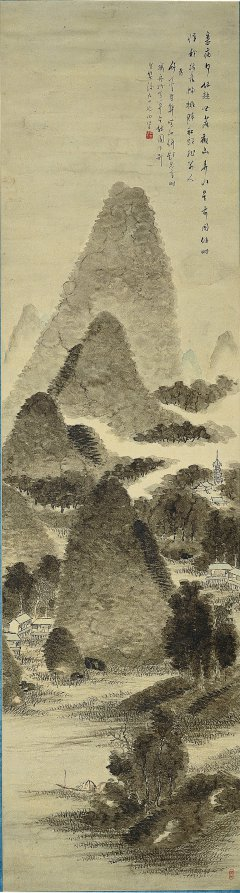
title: Mountain View and Blue Water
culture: Japan, Edo period (1615–1868)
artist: Tanomura Chikuden (Japanese, 1777–1835)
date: early 1800s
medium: hanging scroll; ink, color, and gold on paper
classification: Painting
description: Tanomura Chikuden was an eminent painter whose adopted son, Tanomura Chokunyū (1814–1907), was Seifū Yohei III’s painting teacher. This work was displayed at a gathering commemorating the 10th anniversary of Chokunyū’s death, something we know only because its custom-made box and archival documents have been carefully kept together. The box inscription also confirms that Chikuden was emulating the style of the Mi family of painters, active during China’s Southern Song dynasty (1127–1279). The painting’s Chinese-style silk wrapper is inscribed and sealed on its interior by members of Chokunyū’s community.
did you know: The mountain shapes are built up with multiple small wet strokes.